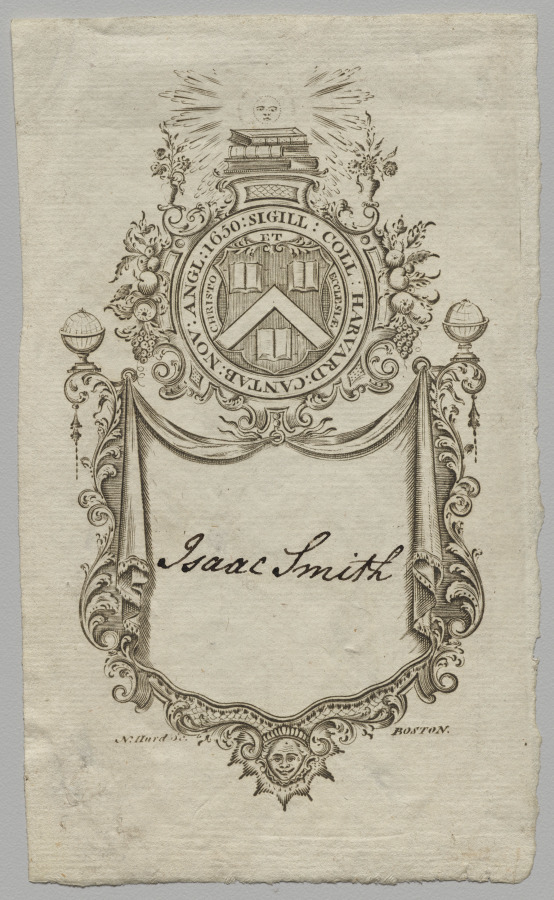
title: Bookplate: Coat of Arms with Isaac Smith inscribed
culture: America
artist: Nathaniel Hurd (American, 1730–1778)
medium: engraving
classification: Print